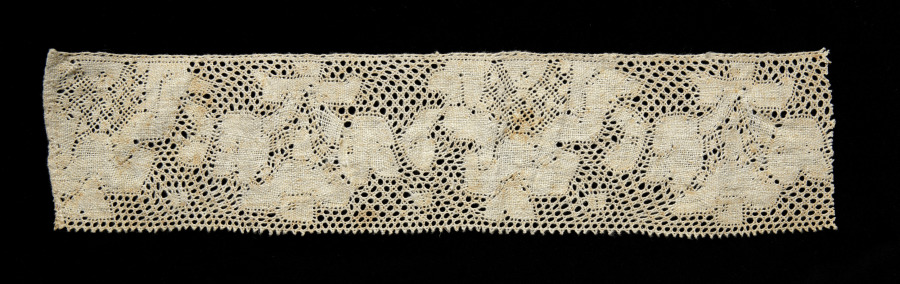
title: Lace Insertion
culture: Italy, Abruzzi, Pescocostanzo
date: 1600s–1700s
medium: Bobbin lace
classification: Lace